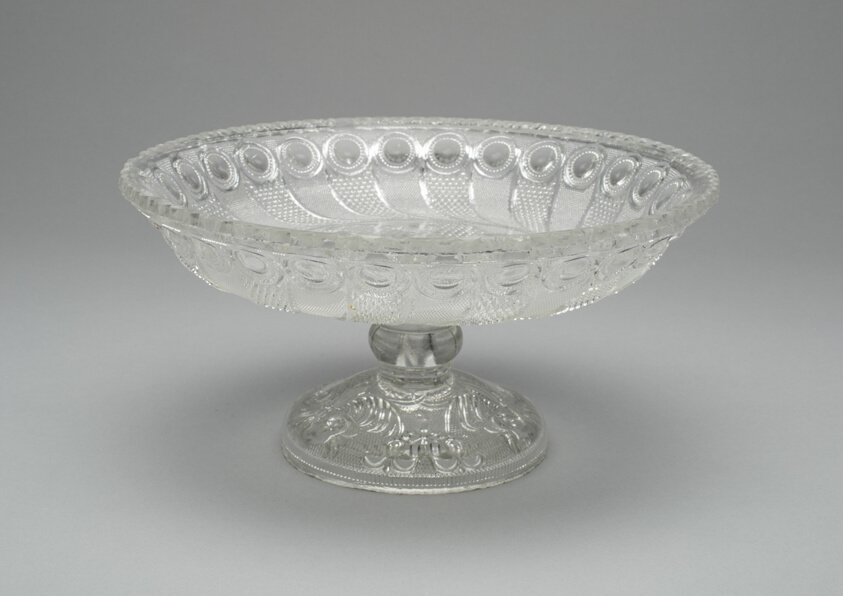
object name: Glass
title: Compote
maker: Attributed to Boston and Sandwich Glass Company; American, 1825–88; Sandwich, Massachusetts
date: 1835–50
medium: Pressed glass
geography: Boston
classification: compote; glass; vessel for serving food; american decorative arts; american arts; decorative arts